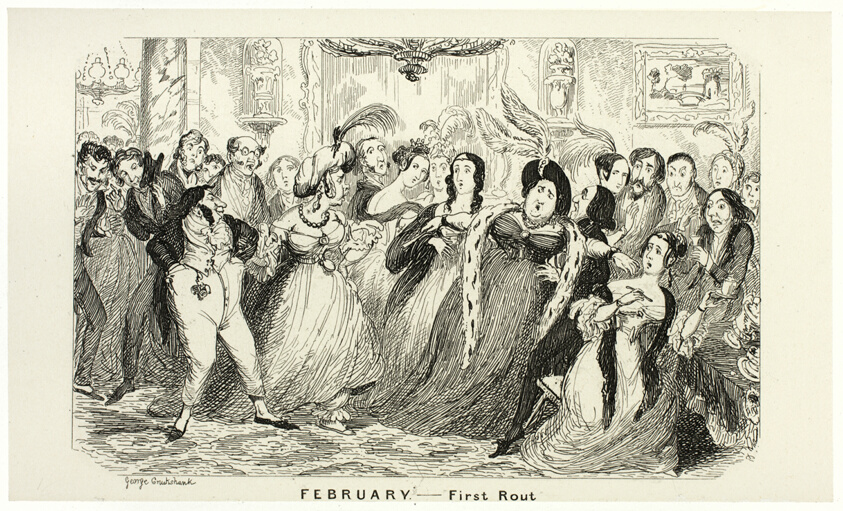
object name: Print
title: February - First Rout from George Cruikshank's Steel Etchings to The Comic Almanacks: 1835-1853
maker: George Cruikshank (English, 1792-1878); published by Pickering & Chatto (English, 19th century)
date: 1840, printed c. 1880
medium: Steel etching in black on cream India paper, laid down on off-white card (chine collé)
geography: England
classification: etching; paper; steel; print; prints and drawing